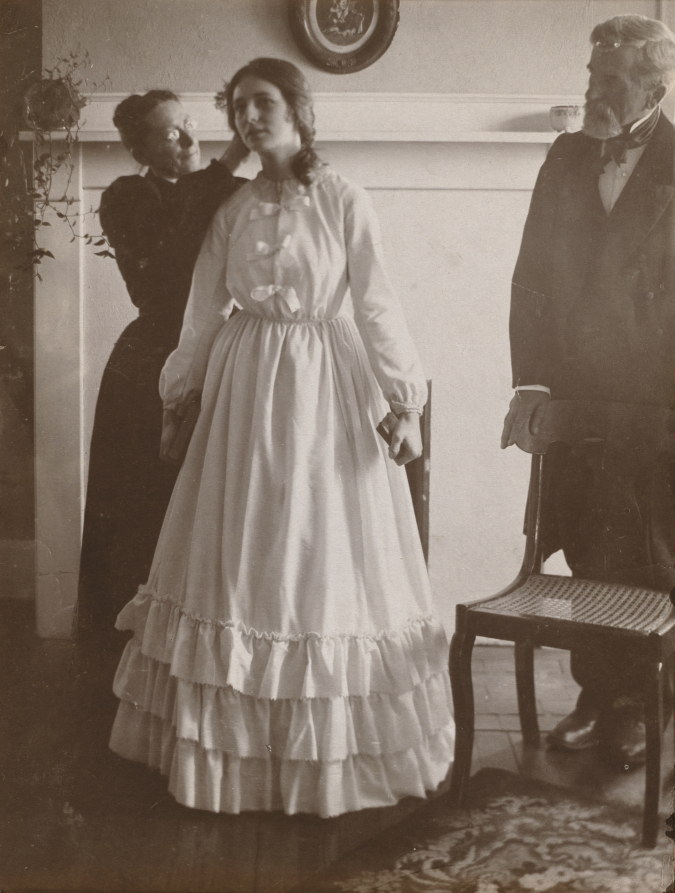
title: Illustration for "Beneath the Wrinkle"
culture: America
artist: Clarence H. White (American, 1871–1925)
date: 1903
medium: gelatin silver print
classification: Photograph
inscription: Written in pencil on recto of original mount: "Clarence H. White '03"; in pencil on verso: "1903"; on verso of photograph: "Clarence White's mother (left) Julia McCune (center) / Deacon Evans (right) / by Clarence White / An illustration for a magazine / by Clara Morris [underlined] (?) 1903"; in pencil on verso of mount: "1903"